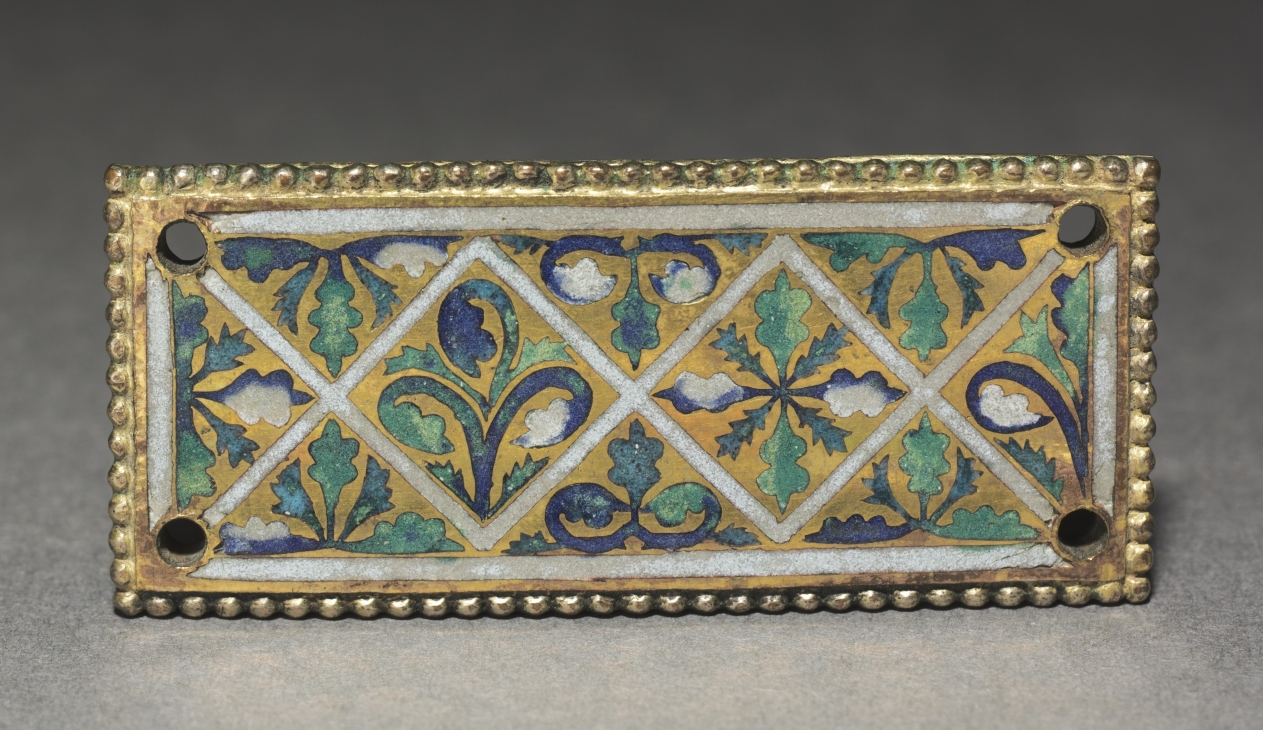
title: Plaque from a Reliquary Shrine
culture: Germany, Rhine Valley, Cologne, Romanesque period, 12th century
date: c. 1170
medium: gilded copper; champlevé and cloisonné enamel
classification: Enamel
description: These decorative enamel plaques (1953.274, 1953.638, 1957.502, and 1961.27) have been linked to some of Cologne's most important reliquary shrines, namely the shrine of the Three Kings at Cologne Cathedral and the shrines of Saints Maurinus and Albinus in the Benedictine abbey church of Saint Panteleon.